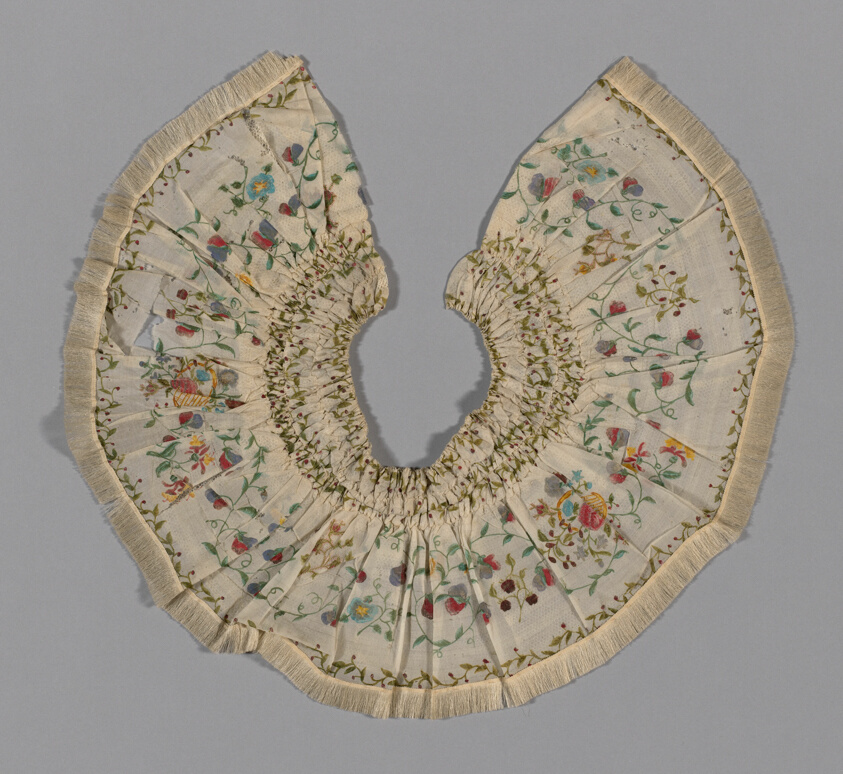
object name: Textile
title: Flounce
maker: France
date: 1850/60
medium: Silk, plain weave; painted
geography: France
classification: textile; fringe; dress (garment); costume component; weaving - printed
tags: flowers, foliage, garlands, white (color), pink (color), purple (color), yellow (color), blue (color)